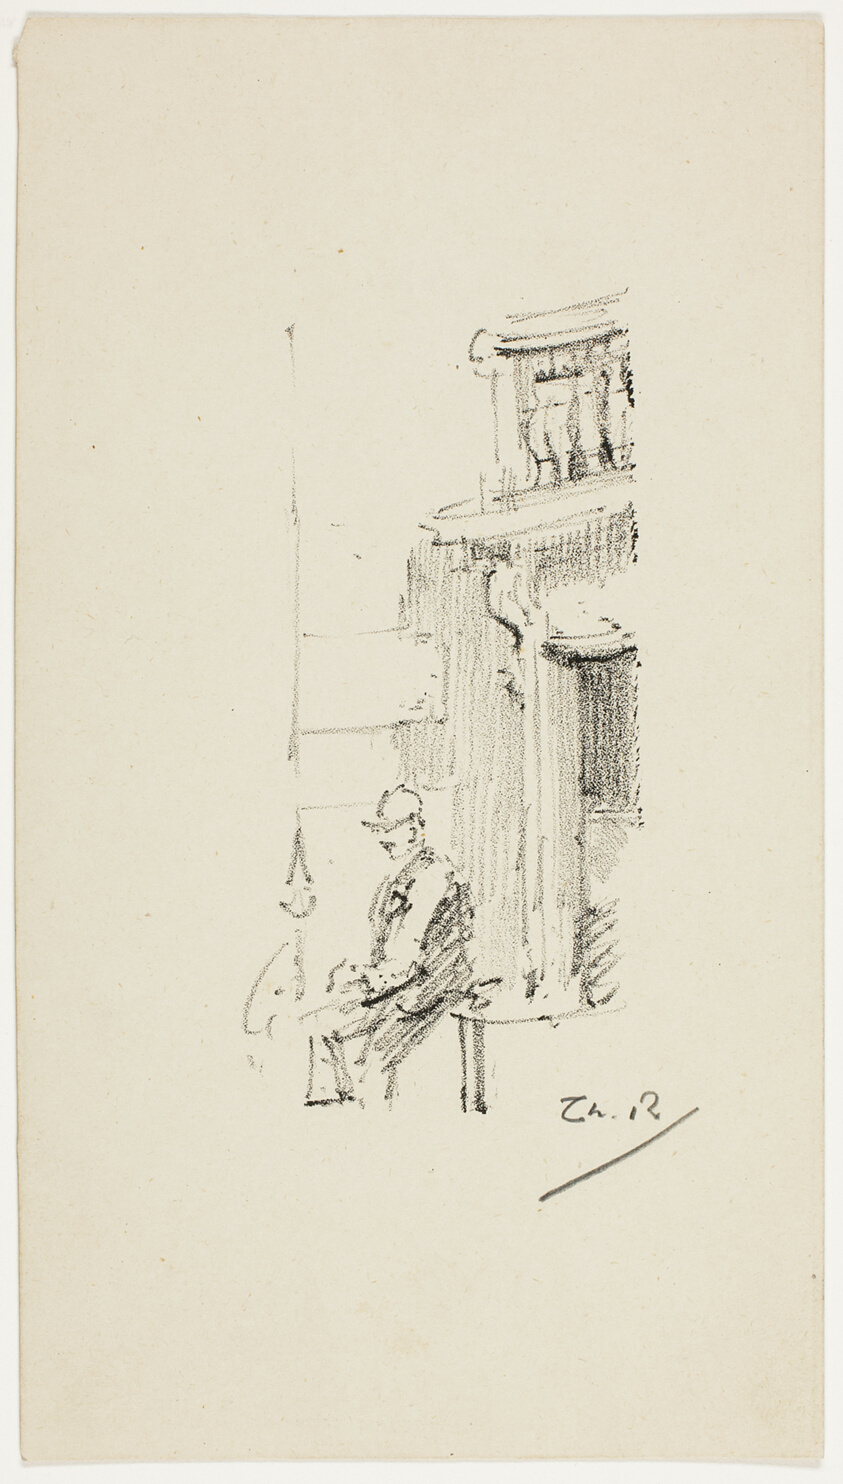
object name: Print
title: Figure and Doorway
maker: Theodore Roussel (French, worked in England, 1847-1926)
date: 1890–94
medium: Transfer lithograph in black on cream wove paper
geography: England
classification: lithograph; paper; print; prints and drawing